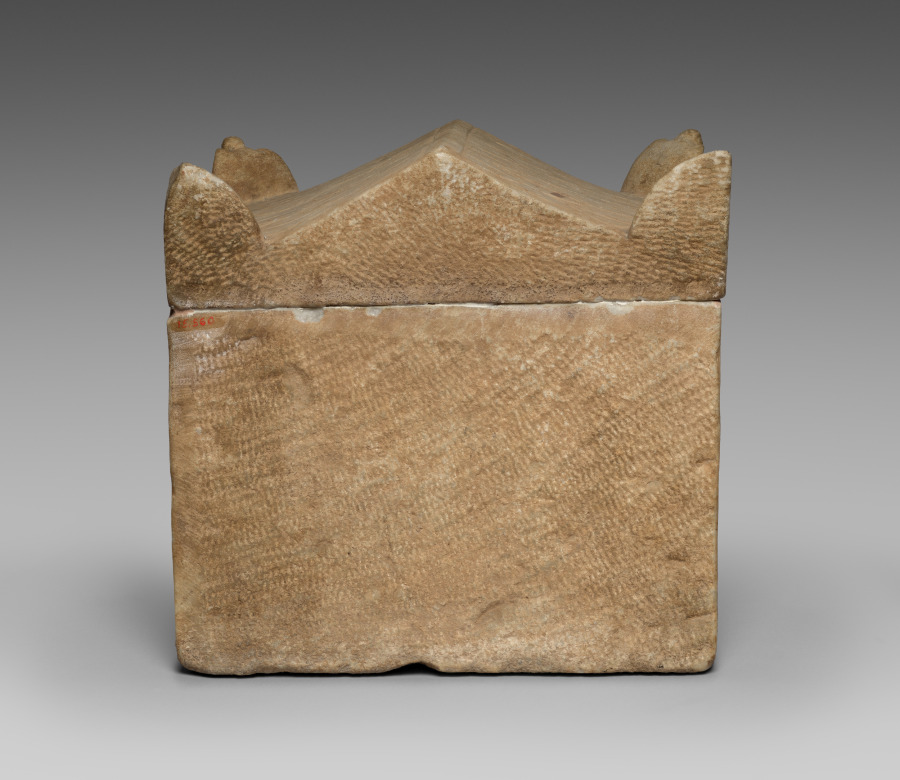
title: Cinerary Box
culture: Italy, Roman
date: 1–100 CE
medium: marble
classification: Sculpture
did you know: The central rectangular plaque would have been inscribed with an epitaph, either painted or carved.